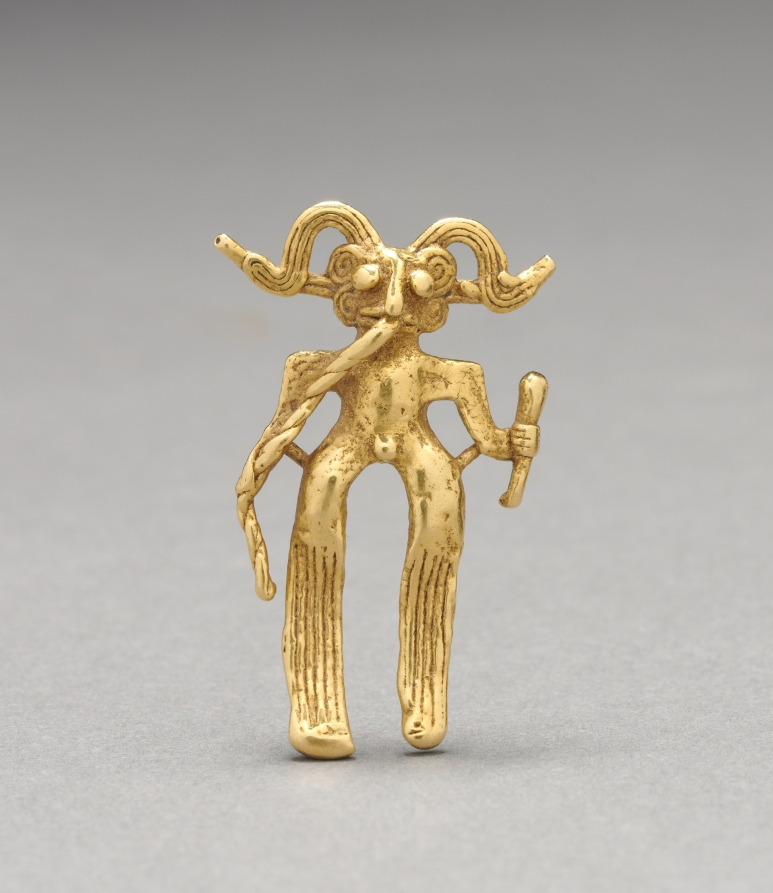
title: Figurine Pendant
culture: Western Panama, Veraguas-Gran Chiriquí Style, 11th-16th century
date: c. 1000–1500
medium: cast gold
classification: Metalwork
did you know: In the Panama-Costa Rica region, gold ornaments were associated with political and religious authority.